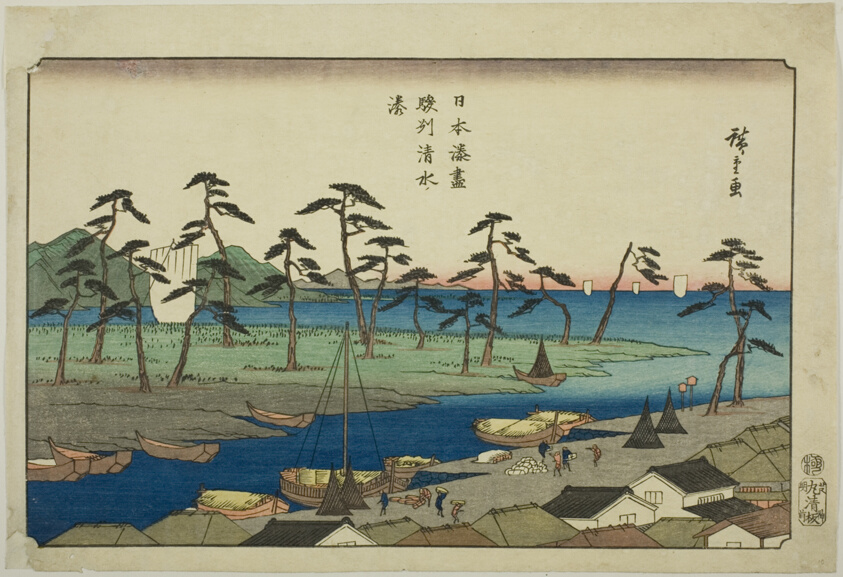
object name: Print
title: Shimizu Harbor in Suruga Province (Sunshu Shimizu minato), from the series "Harbors of Japan (Nihon minato zukushi)"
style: Japanese (culture or style)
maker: Utagawa Hiroshige 歌川 広重; Japanese, 1797-1858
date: c. 1840/44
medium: Color woodblock print; oban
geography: Japan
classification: woodblock print; print; asian art